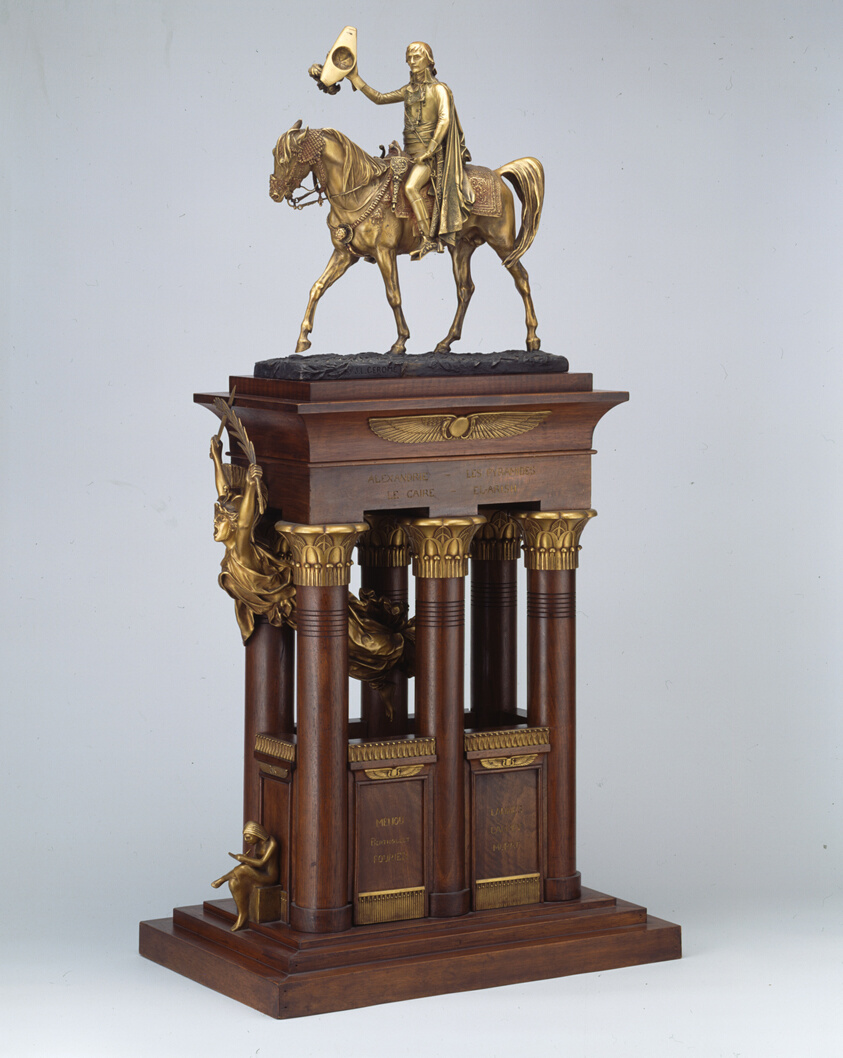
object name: Sculpture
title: Napoleon Entering Cairo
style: 20th Century, 19th century, nineteenth century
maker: Jean Léon Gérôme (French, 1824–1904); Cast by Siot-Decauville (French)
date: c. 1900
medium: Gilt bronze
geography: France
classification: statuette; sculpture; french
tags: Napoleon, woman, palm, Egypt, hat, horse, monuments, swords, victory